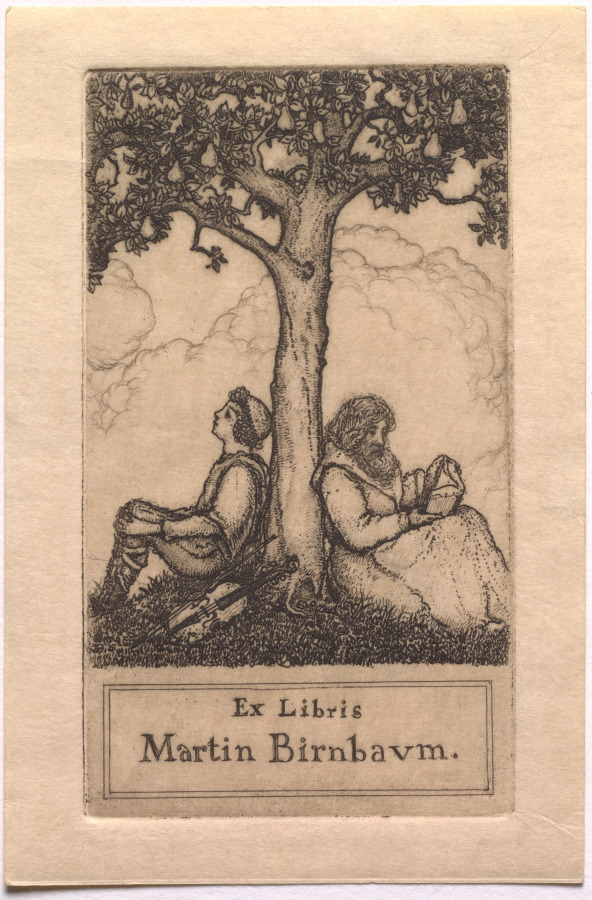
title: Bookplate of Martin Birnbaum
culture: America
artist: Ernest Haskell (American, 1876–1925)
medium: etching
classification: Print